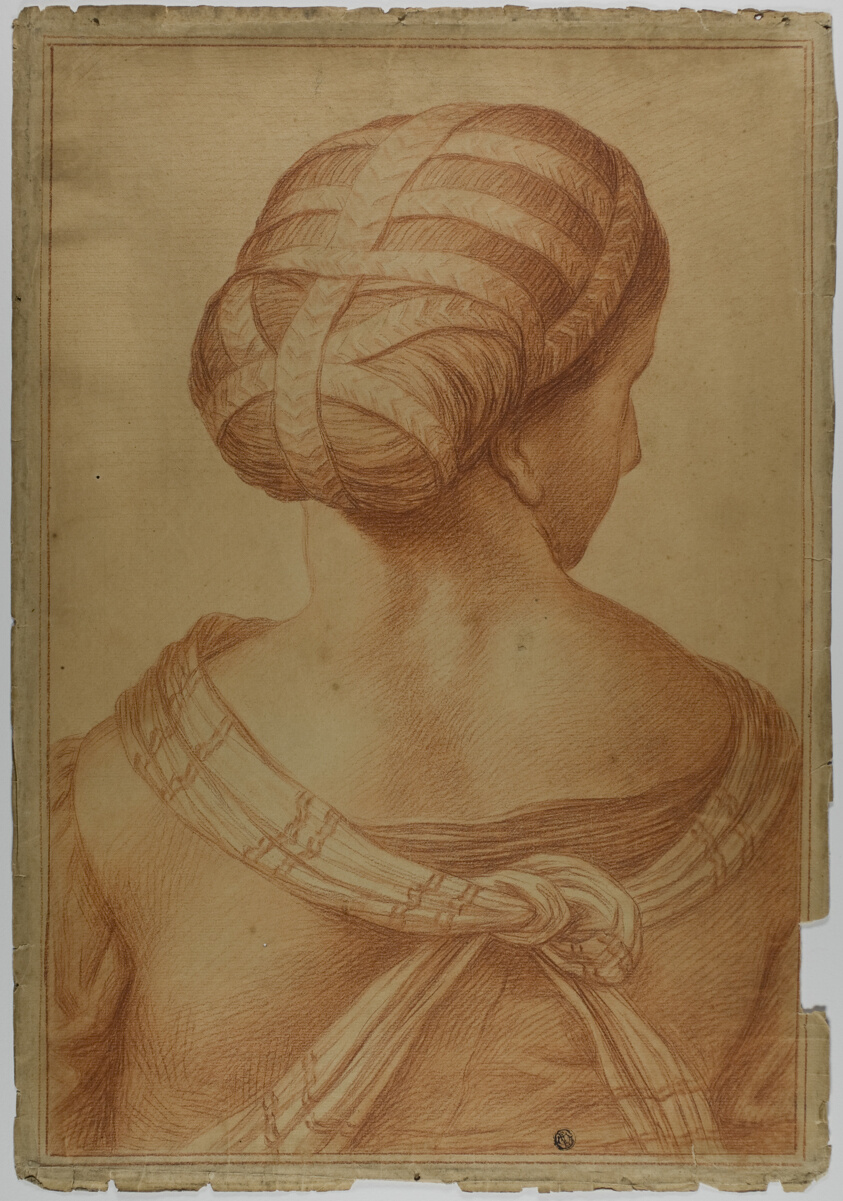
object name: Drawing and Watercolor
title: Muse Seen from the Back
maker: After Raffaello Sanzio, called Raphael; Italian, 1483-1520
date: 18th century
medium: Red chalk with stumping and red chalk wash on cream laid paper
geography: Italy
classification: chalk; drawings (visual works); prints and drawing